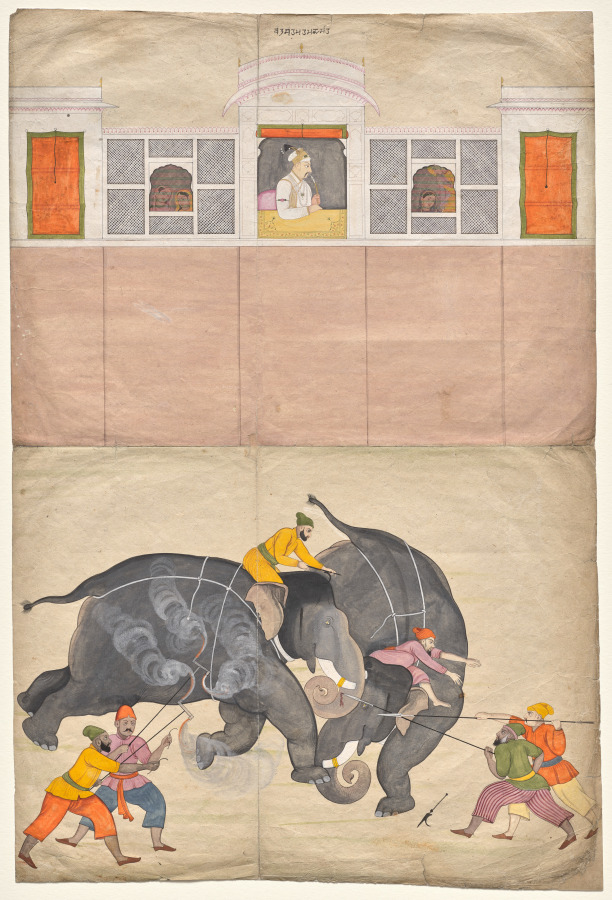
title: Two Elephants Fighting in a Courtyard Before Muhammad Shah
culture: Northern India, Himachal Pradesh, Guler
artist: attributed to Nainsukh (Indian, 1710–1778)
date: c. 1730–40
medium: Gum tempera, ink, and gold on paper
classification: Painting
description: The Mughal emperor responsible for a revival of courtly arts and pastimes was Muhammad Shah (reigned 1719–48). This painting was made by an artist from a small kingdom in the western Himalayas who stayed at the Mughal court in Delhi and painted scenes of his experiences. Like his predecessors, Muhammad Shah enjoyed watching elephant fights. He is shown in his window of public audience, marked by a golden carpet, smoking a hookah. Women from his harem can be seen looking on from behind painted screens. Two pairs of men hold fire brands and spears to prevent the elephants from running off and to keep them under control. The intensity of the fight—captured at a moment when one mahout, or elephant trainer, has dropped his goad and is about to jump off—is augmented by the dense colors and forms in contrast to the otherwise pale planes, balanced only by the strip of palace windows.